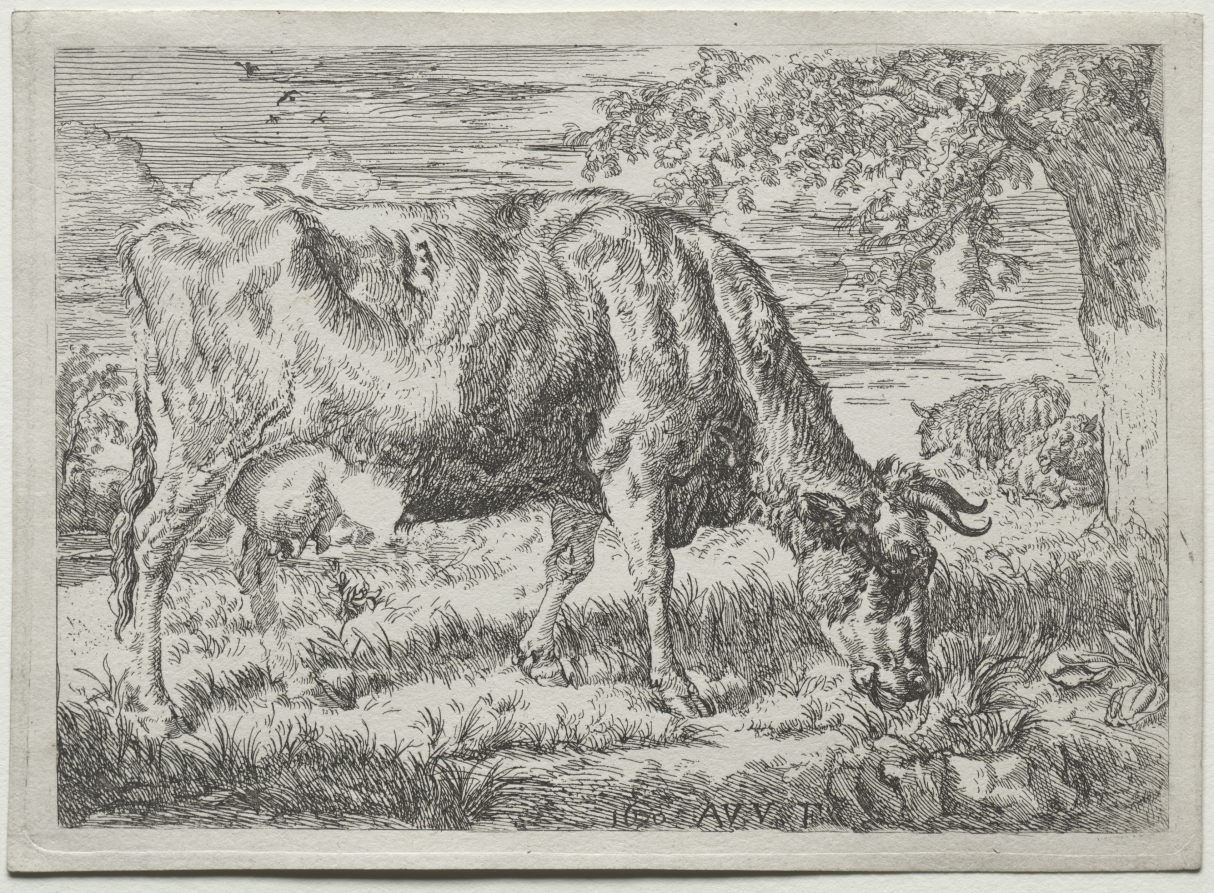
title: Cow and Two Sheep at the Foot of a Tree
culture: Netherlands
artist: Adriaen van de Velde (Dutch, 1636–1672)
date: 1670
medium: etching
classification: Print